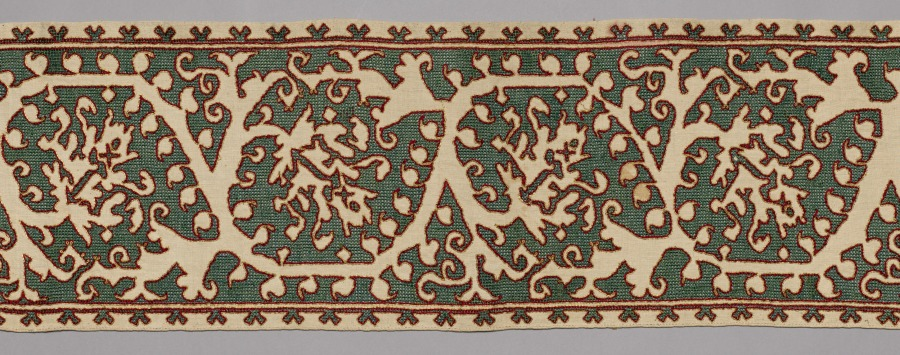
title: Embroidered Strip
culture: Italy, 17th century (copy of)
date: before 1916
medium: Linen: silk and gold filé, embroidery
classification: Embroidery